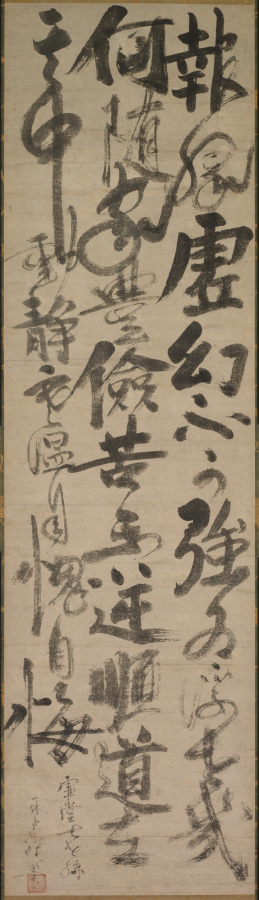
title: Reflections of Priest Foyen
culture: Japan, Muromachi period (1392–1573)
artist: Ikkyū Sōjun (Japanese, 1394–1481)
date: 1400s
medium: hanging scroll, ink on paper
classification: Painting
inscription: signed: "Kido nanasei son, Ikkyūshi Sōjun sho (Written by Ikkyū Sōjun, the seventh generation of Kido)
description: Left by his mother at a small Zen temple in Kyoto at the age of six, Ikkyu later drew on his early studies and experiences for his writings, which focused on his keen interest in the Chinese classics. Poetry in particular was a favorite subject and images from classical poetry or passages from favorite poems or commentaries frequently provided Ikkyu with the core ideas for his own work. A rare example of his calligraphy, this narrow scroll contains a verse in eight phrases, each comprising four characters. The whole verse is organized in three towering lines of brusque, emphatic calligraphy augmented by Ikkyu's signature-the two lines of running script in the lower left corner. The text refers to a passage included in the Chronicle of the Zen Sect that contains a cautionary reminder attributed to the legendary Chinese monk Foyen Qingyuan (1067-1120), long revered in Japan. The initial phrase begins: "Life is a mirage."